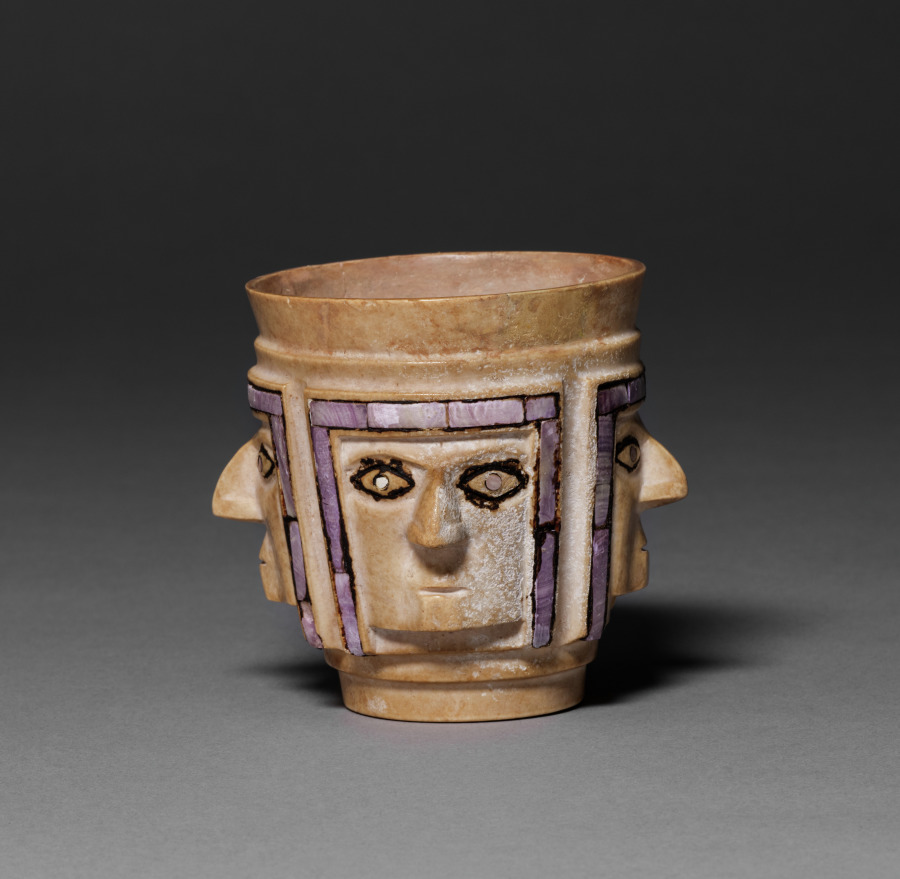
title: Cup with Four Faces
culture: Central Andes, Wari people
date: 600–1000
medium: Stone with shell inlay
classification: Stone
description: The identity of the four, wide-eyed faces on this cup is unknown. Equally mysterious is the cup’s function. It seems too small to be used for drinking beer at the feasts the Wari sponsored to put others in their debt. The size may suggest the cup was used in more intimate circumstances, perhaps to make libations to sacred forces that animated the ancient landscape.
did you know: The inlay is made of spondylus (thorny oyster) shell, a form of wealth in antiquity.